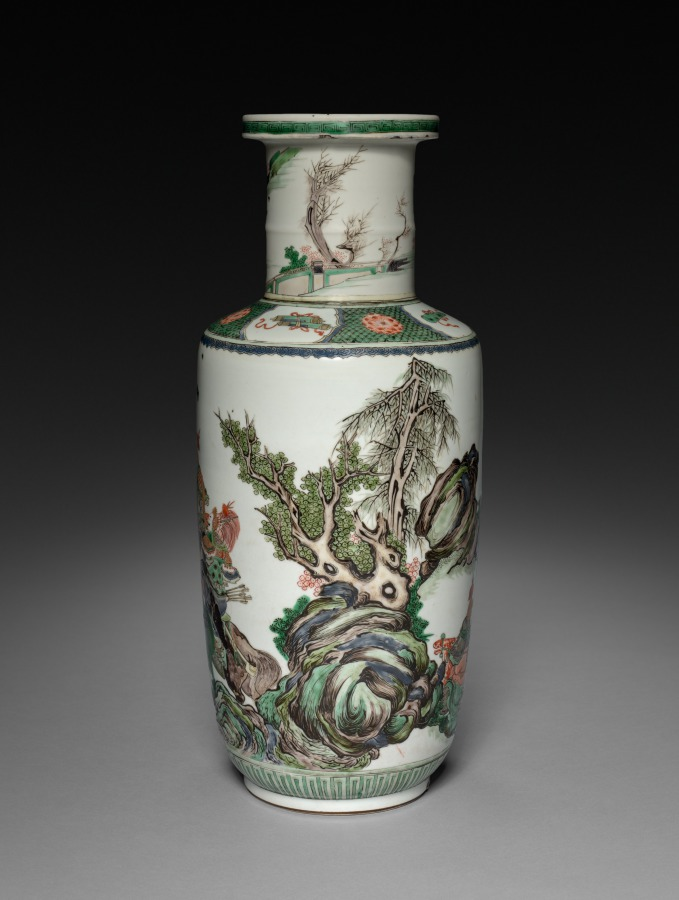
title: Vase with Decoration of Figures in Chariots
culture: China, Qing dynasty (1644-1911), Kangxi reign (1662-1722)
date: 1622–1722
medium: porcelain with famille verte overglaze enamel decoration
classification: Ceramic